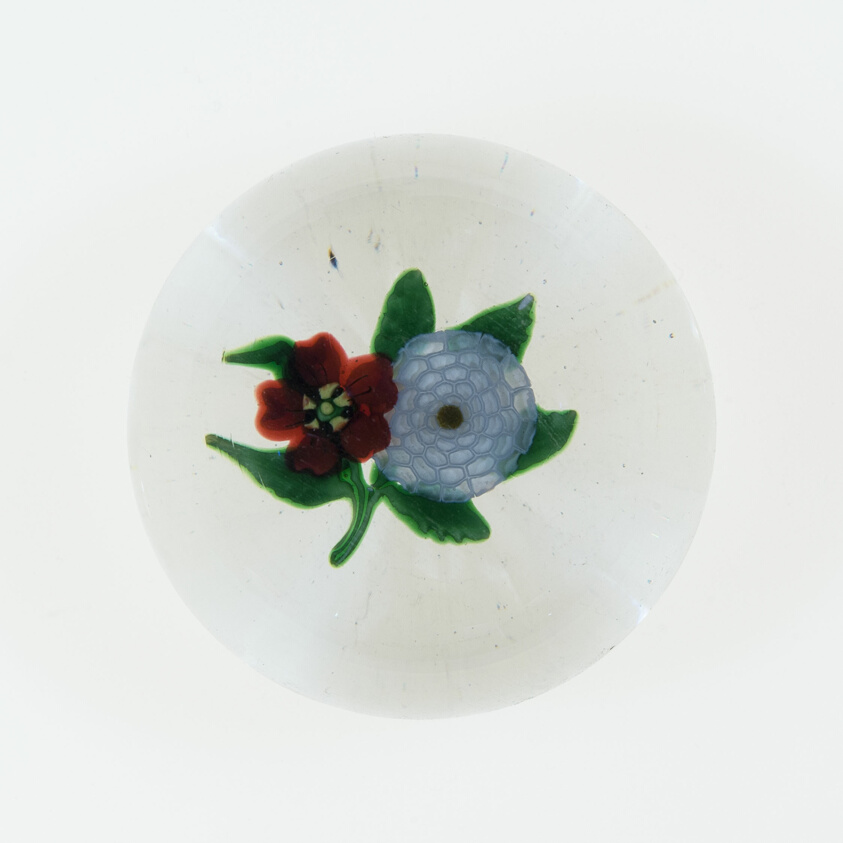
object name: Glass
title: Paperweight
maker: Saint-Louis Glassworks (Cristalleries de Saint-Louis); Lorraine, France, founded 1586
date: c. 1845–60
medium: Glass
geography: Saint-Louis-lès-Bitche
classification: paperweight; glass